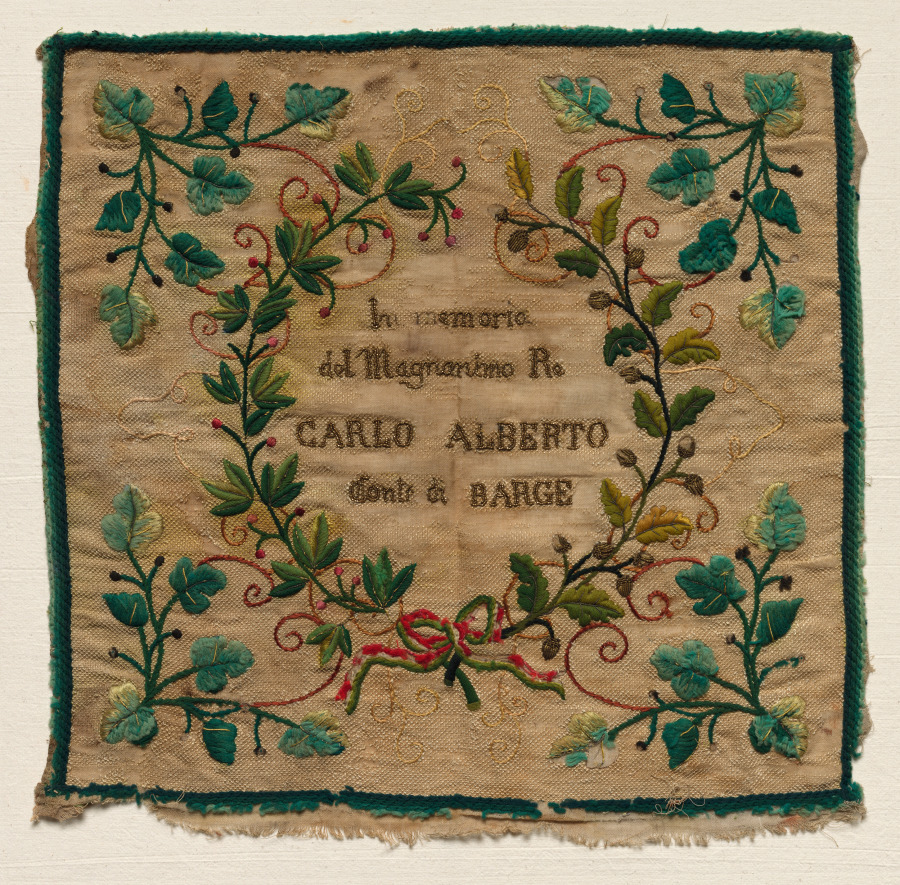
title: Sampler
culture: Italy, 19th century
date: 1800s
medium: embroidered linen or cotton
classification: Sampler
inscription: "In memoria del Magnanimo Re Carlo Alberto Conte di Barge."